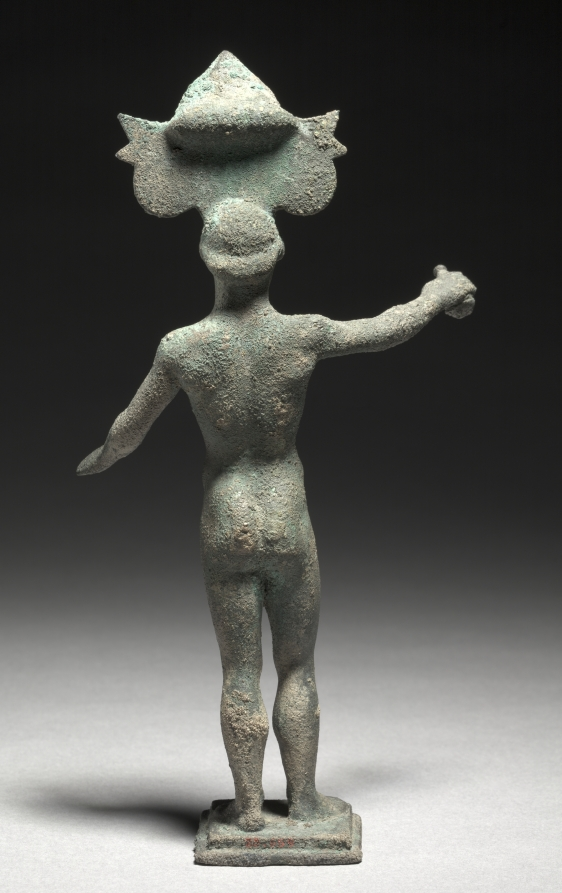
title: Mirror Support: Athlete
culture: South Italy, Locri (?), Greek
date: 460–450 BCE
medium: bronze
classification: Sculpture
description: A muscular nude youth strides forward on a square metal plate with his arms outstretched. The plate and the volute decoration that adorns his head suggest that this statuette was the support for a mirror. The youth is likely an athlete, as he holds an alabastron or oil vessel in his right hand. The oil may be an offering to the gods for victory, or to rub onto the skin to protect and beautify his body before an athletic contest. The mirror was made separately and would have been attached to the triangular tang above the athlete’s head.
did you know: Most Greek mirror stands depict female figures, but this one depicts a male.